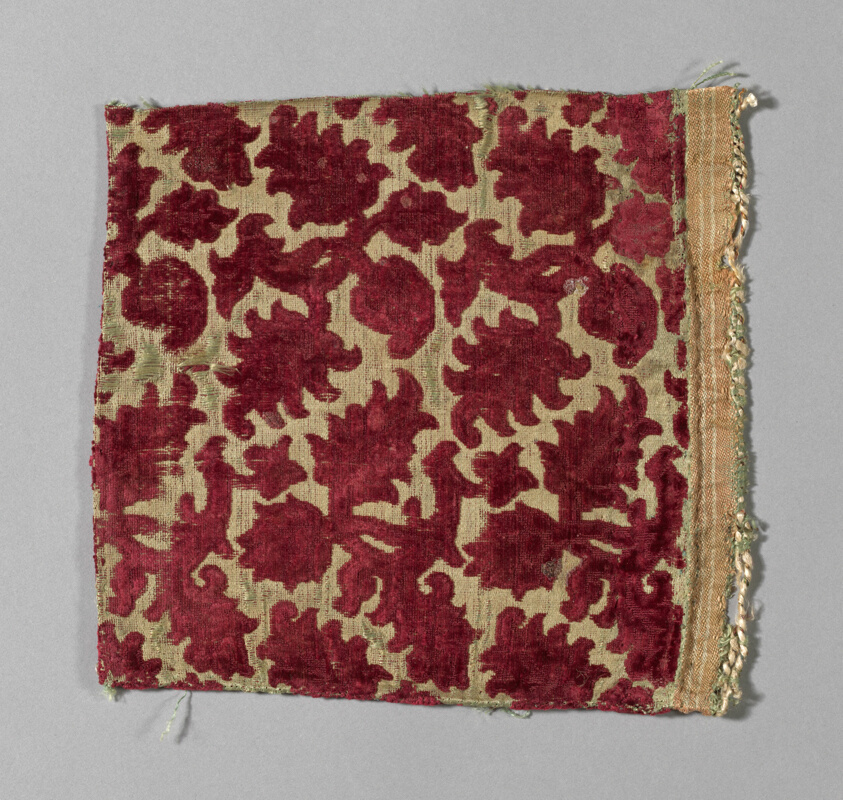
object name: Textile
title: Fragment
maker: Italy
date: 1601/25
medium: Silk, satin weave with supplementary warps forming cut, uncut, and voided velvet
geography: Italy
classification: textile; weaving - velvet; weaving